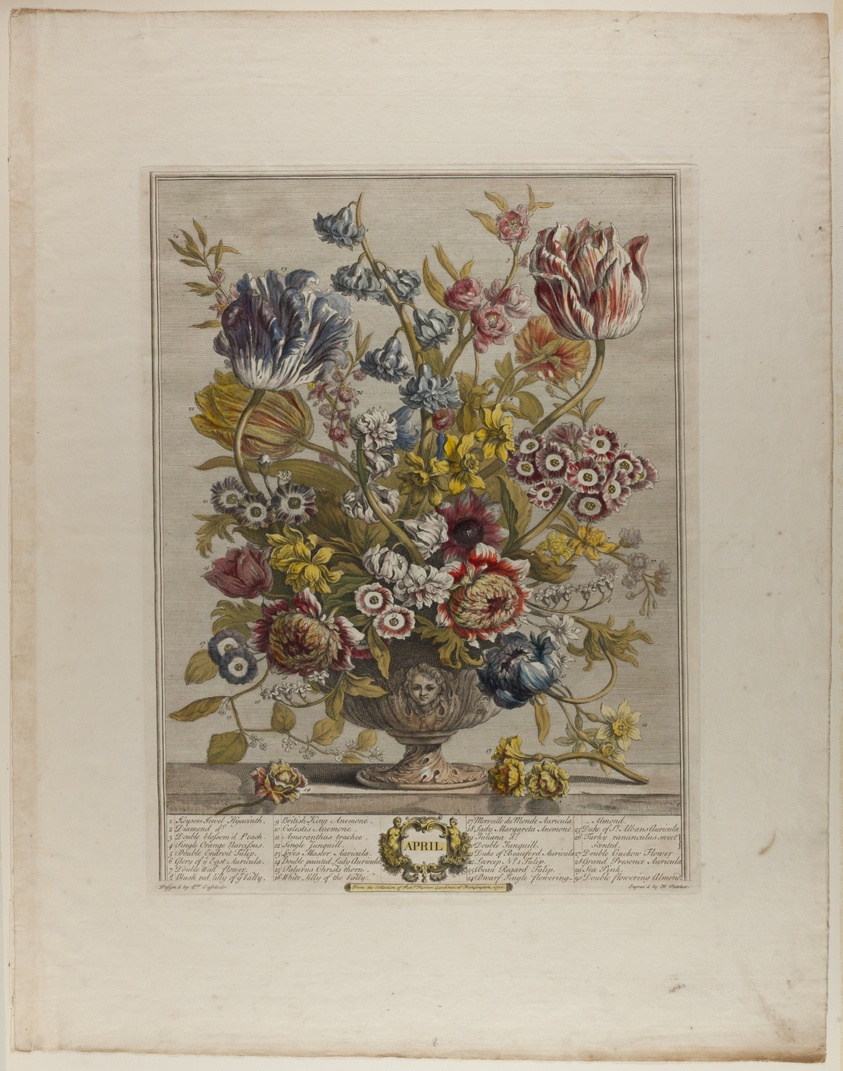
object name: Print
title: April, from Twelve Months of Flowers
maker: Henry Fletcher (English, 1710-1750); after Peter Casteels III (Flemish, 1684-1749)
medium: Engraving in black ink with opaque and translucent watercolor on cream laid paper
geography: England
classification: etching; print; prints and drawing